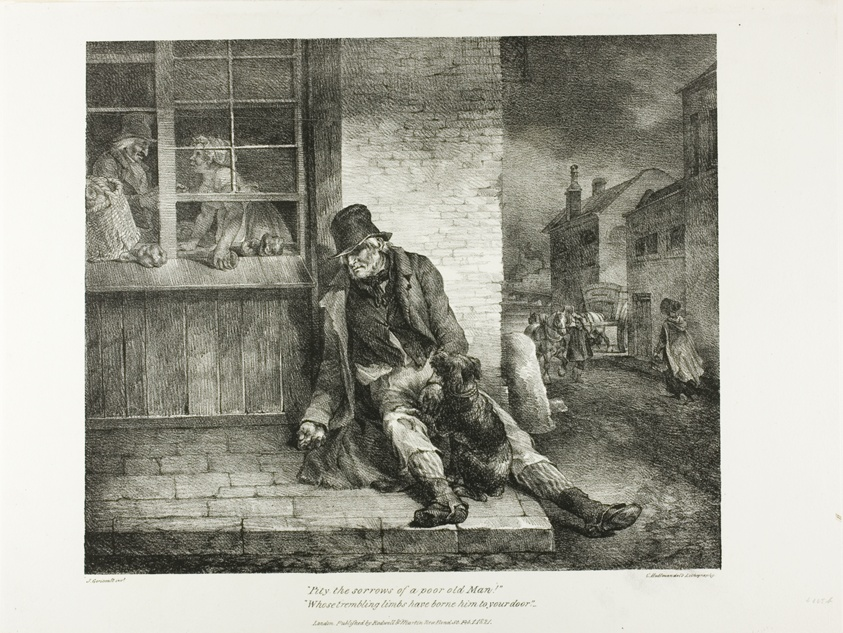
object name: Print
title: Pity the Sorrows of a Poor Old Man!... plate 2 from Various Subjects Drawn from Life and on Stone (The English Suite)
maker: Jean Louis André Théodore Géricault (French, 1791-1824); printed by Charles Joseph Hullmandel (German and English, 1789-1850); published by Rodwell and Martin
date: February 1821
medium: Lithograph in black on ivory wove paper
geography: France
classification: lithograph; print; prints and drawing